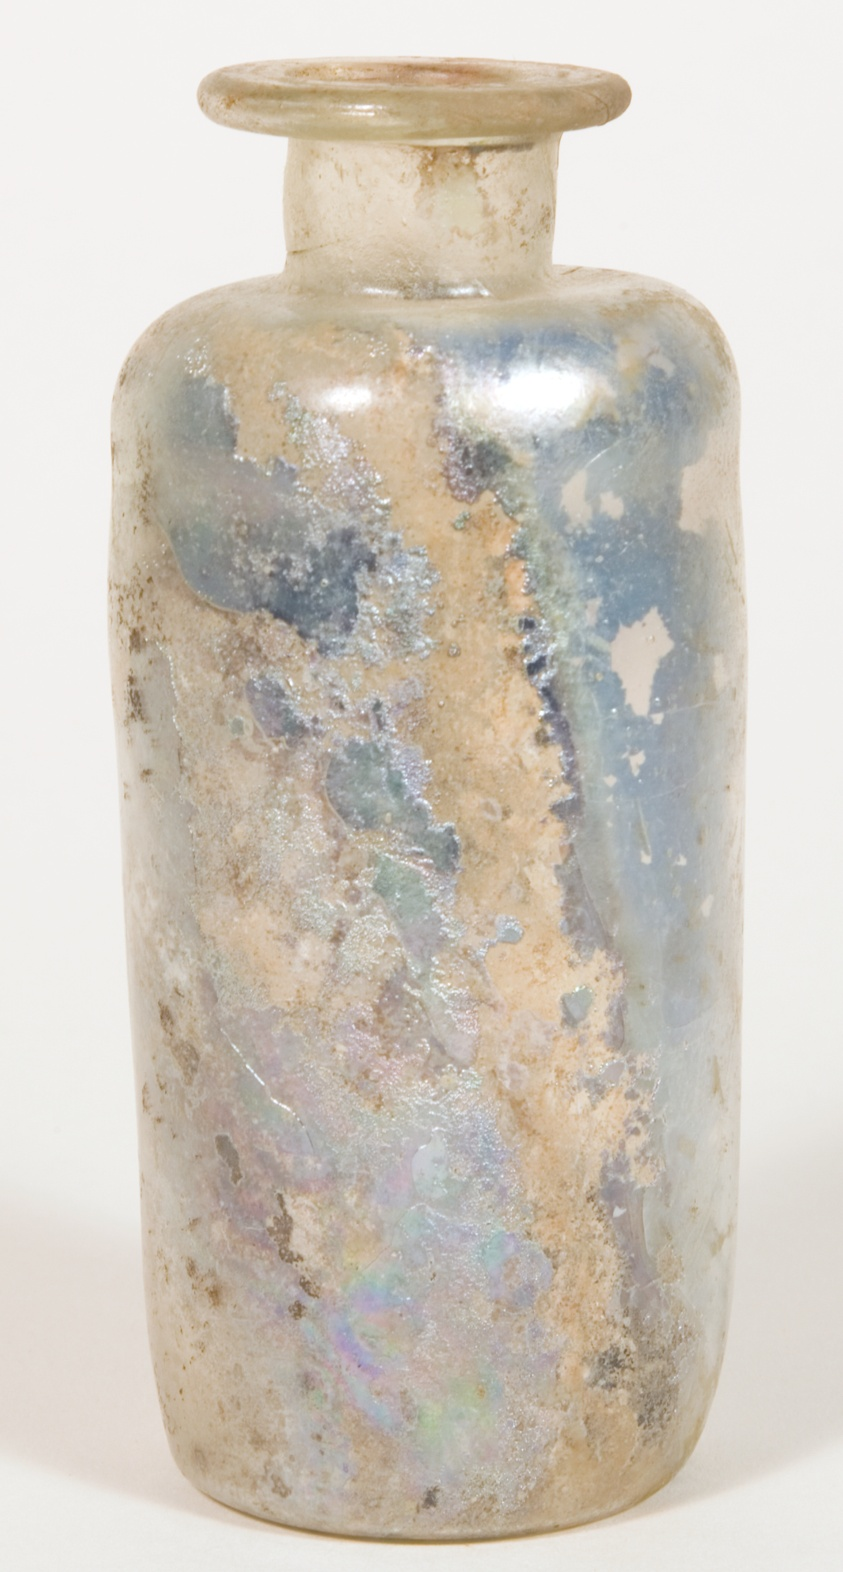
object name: Vessel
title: Flask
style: syrian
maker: Roman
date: 2nd century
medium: Glass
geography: Syria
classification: vessel; glass; ancient art